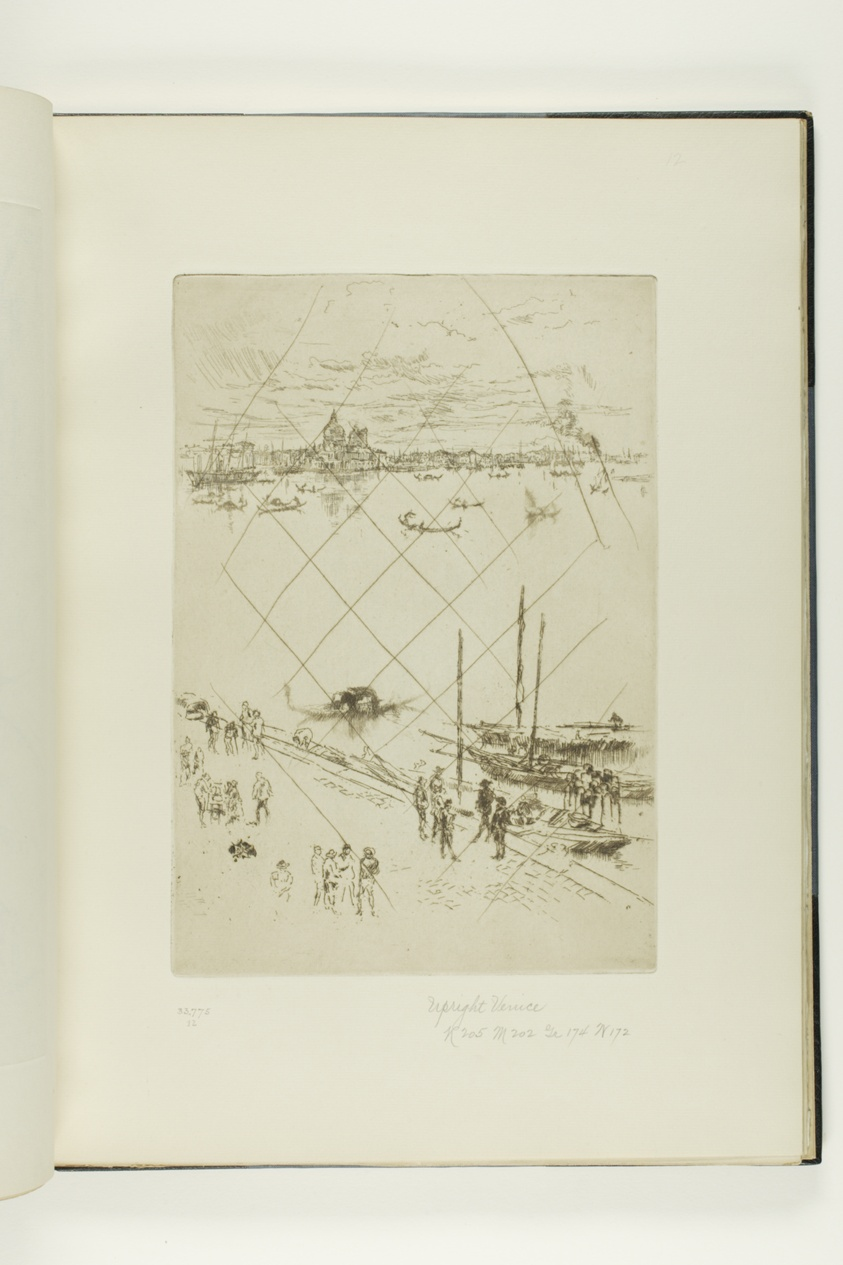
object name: Print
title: Upright Venice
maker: James McNeill Whistler (American, 1834-1903)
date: 1879/80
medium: Etching and drypoint with foul biting, with drypoint cancellation, in dark brown ink on ivory laid paper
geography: United States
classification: etching; print; prints and drawing; foul biting; drypoint; book; paper